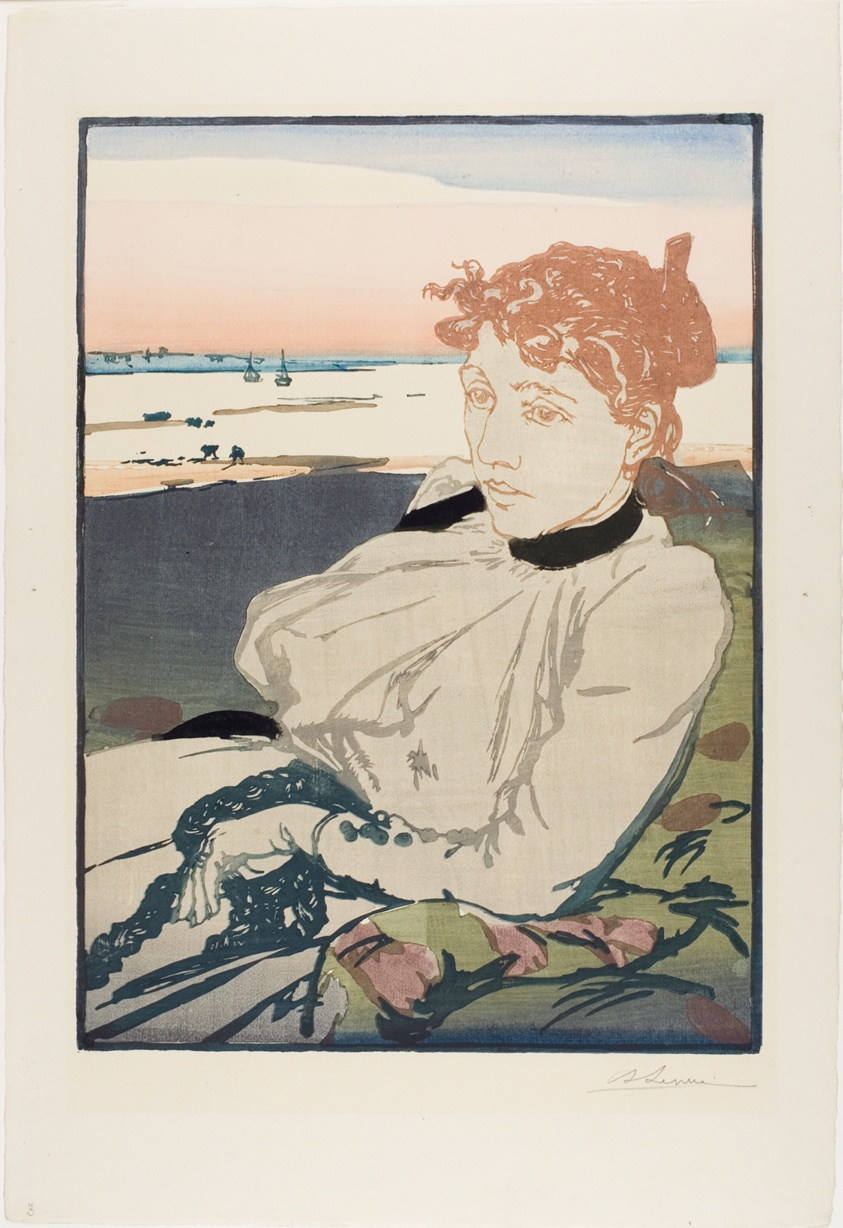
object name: Print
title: The Convalescent, Madame Lepère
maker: Louis Auguste Lepère (French, 1849-1918)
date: 1892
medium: Woodcut from four blocks in water-based colors on cream laid paper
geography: France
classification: woodcut; print; prints and drawing